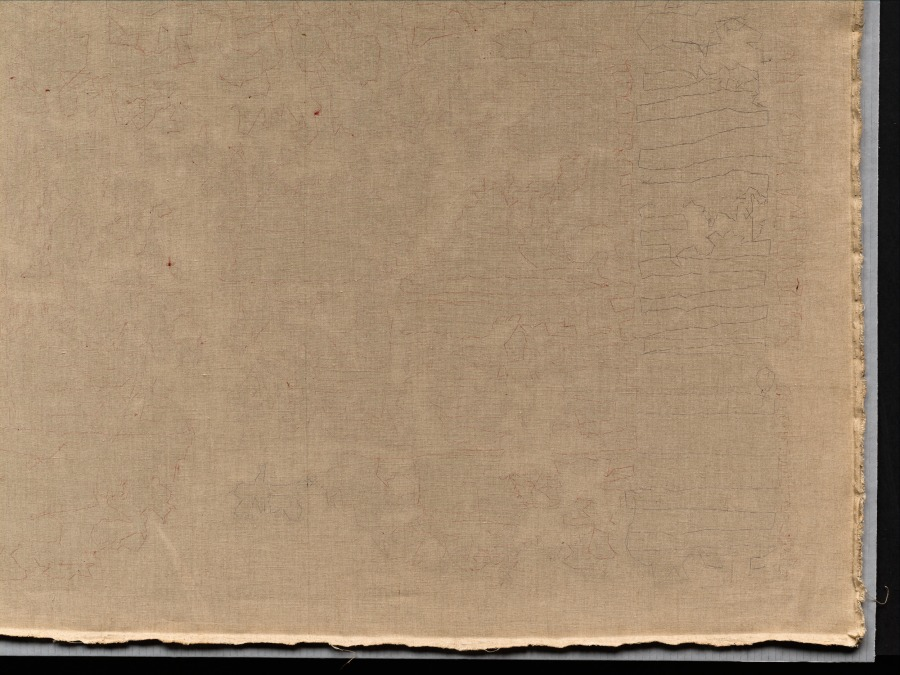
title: Fragment of a Large Hanging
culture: Egypt, Antinoë, Byzantine period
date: 500s CE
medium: tapestry weave (with plain tabby borders): wool and linen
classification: Textile